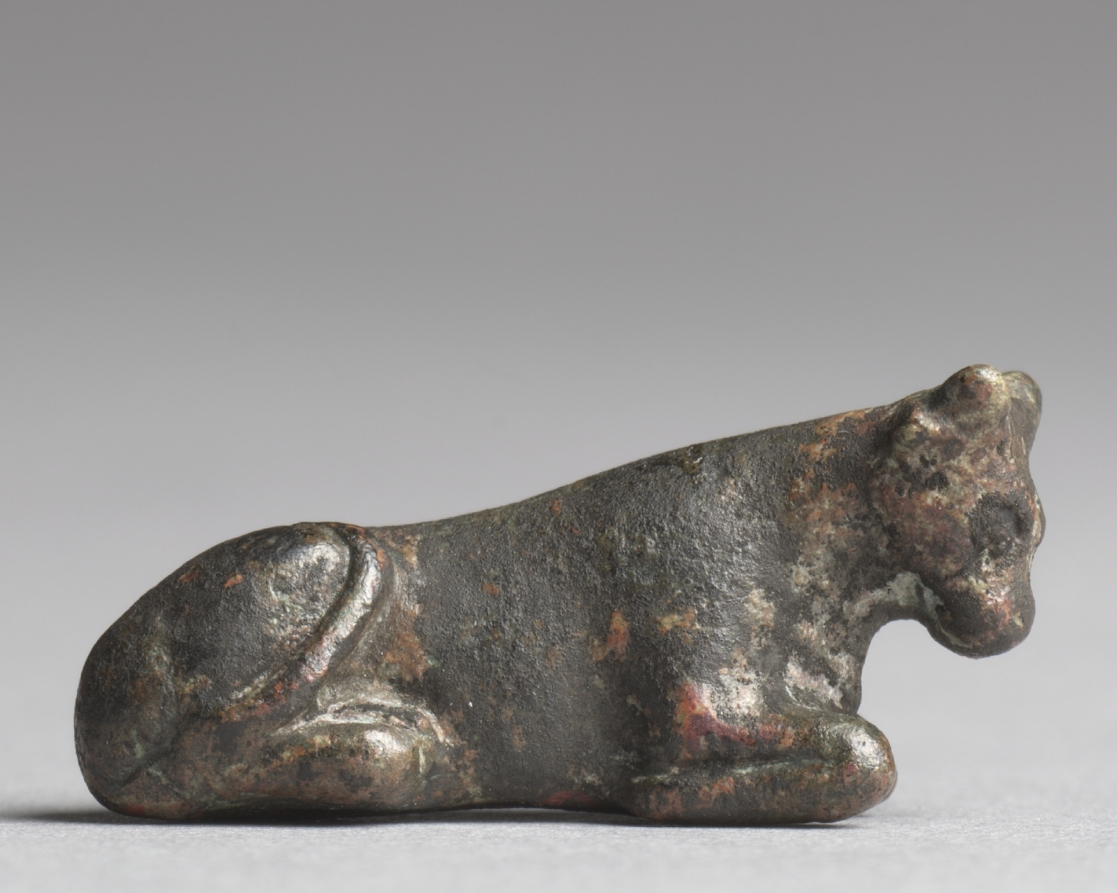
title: Weight in the Form of a Bull or Cow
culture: Egypt, New Kingdom (1540–1069 BCE), Dynasty 18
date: 1540–1296 BCE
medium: tin-bronze, solid cast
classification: Implements